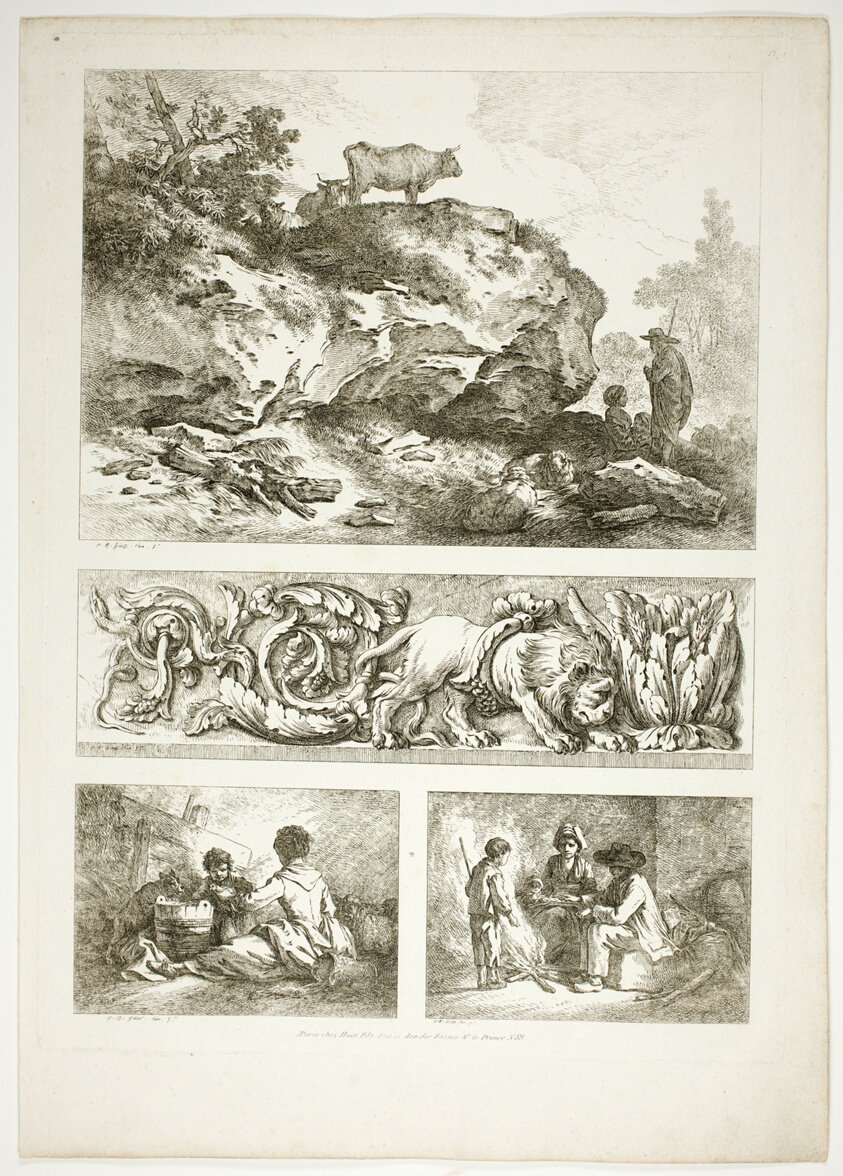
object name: Print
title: Plate Nine of 38 from Oeuvres de J. B. Huet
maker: Jean Baptiste Huet (French, 1745-1811)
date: 1796–99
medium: Etching on paper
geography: France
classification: etching; print; prints and drawing